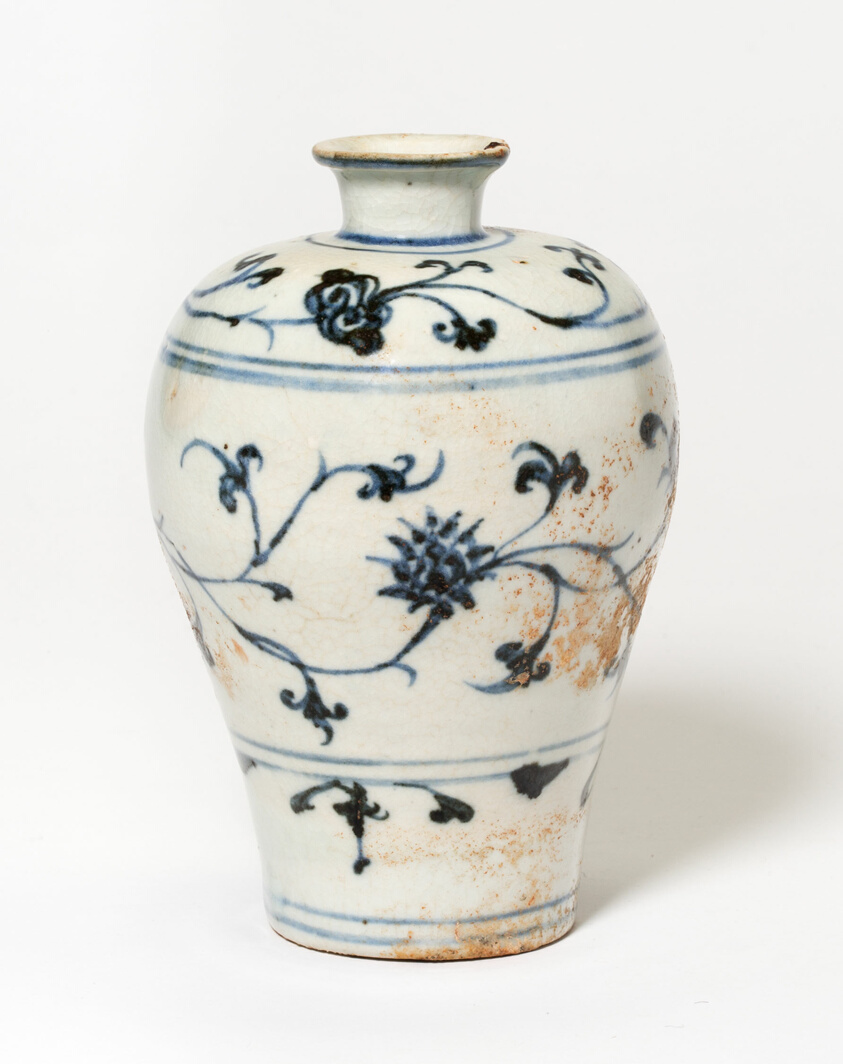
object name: Vessel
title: Vase with Stylized Flowers and Vines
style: Chinese (culture or style)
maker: China or Southeast Asia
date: Ming dynasty (1368–1644)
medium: Porcelain painted in underglaze blue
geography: China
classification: vase; porcelain; vessel; asian art; ceramics